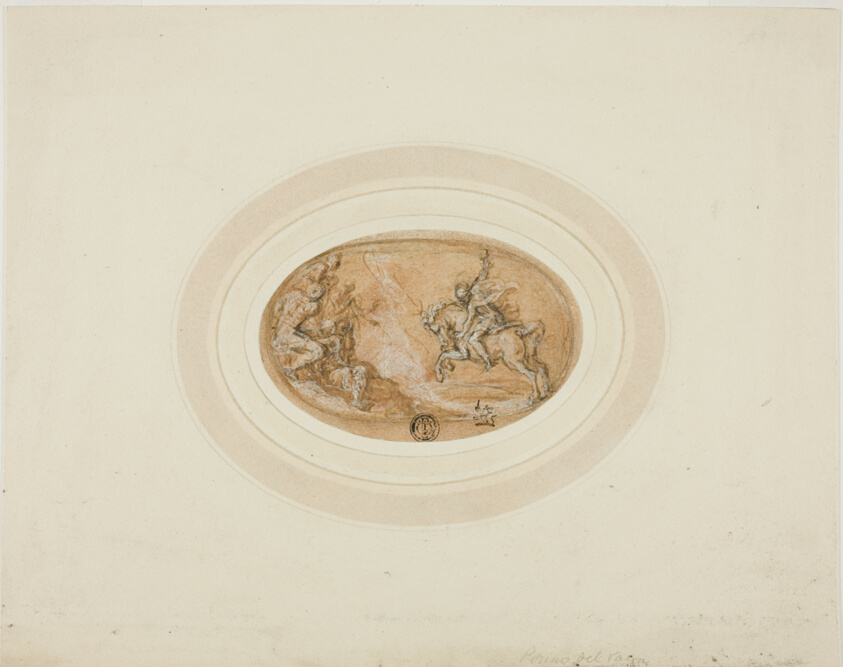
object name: Drawing and Watercolor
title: Marcus Curtius Leaping into the Abyss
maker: Francesco de'Rossi, called Salviati; Italian, 1510-1563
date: 1555/63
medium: Pen and brown ink with brush and brown wash, heightened with white gouache, with traces of black chalk, on oval-shaped tan laid paper, edge mounted on tan wove paper, laid down on ivory wove card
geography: Italy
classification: ink with wash; drawings (visual works); prints and drawing